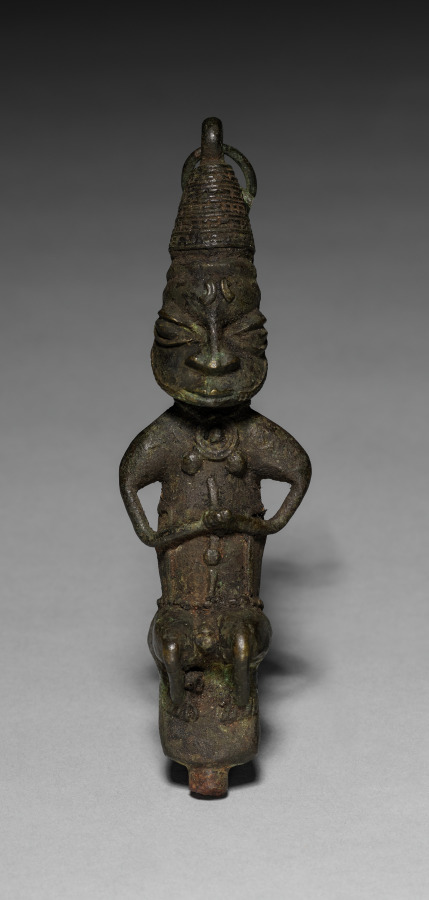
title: Pair of Ritual Staffs (ẹdan Ògbóni)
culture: Africa, West Africa, Nigeria, Yorùbá-style maker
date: possibly 1800s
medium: Copper alloy and iron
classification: Sculpture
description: The chain connecting these two figures allows them to be worn in public by a member of the Ògbóni or Òṣùgbó association as authority emblems. The male on the right gives the association’s typical salute by clasping his left fist on the right one, while the female on the left holds her breasts as a sign of welcome and generosity. The use of copper alloy and iron expresses Ògbóni/Òṣùgbó's concerns with longevity and durability.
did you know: Imagine how this would look when its owner wore it; the chain would go around the back of the neck and the figures would rest on their chest.